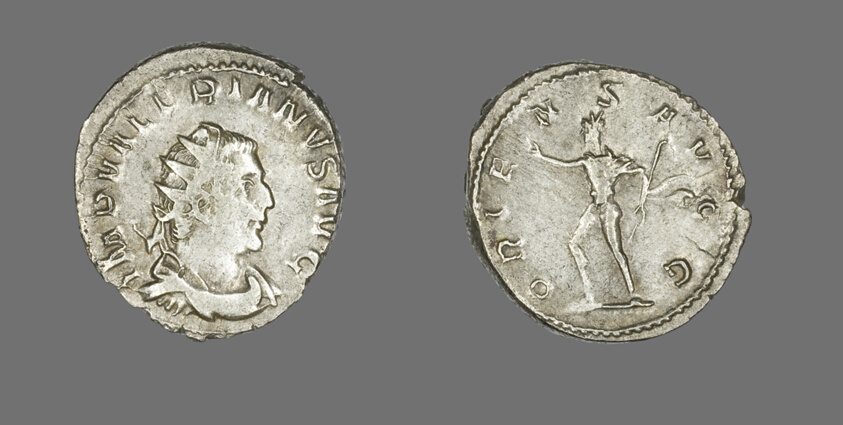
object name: Coin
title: Antoninianus (Coin) Portraying Emperor Valerian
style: roman (ancient, style or period)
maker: Roman, minted in Rome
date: 257-259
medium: Silver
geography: Roman Empire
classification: coin; ancient art